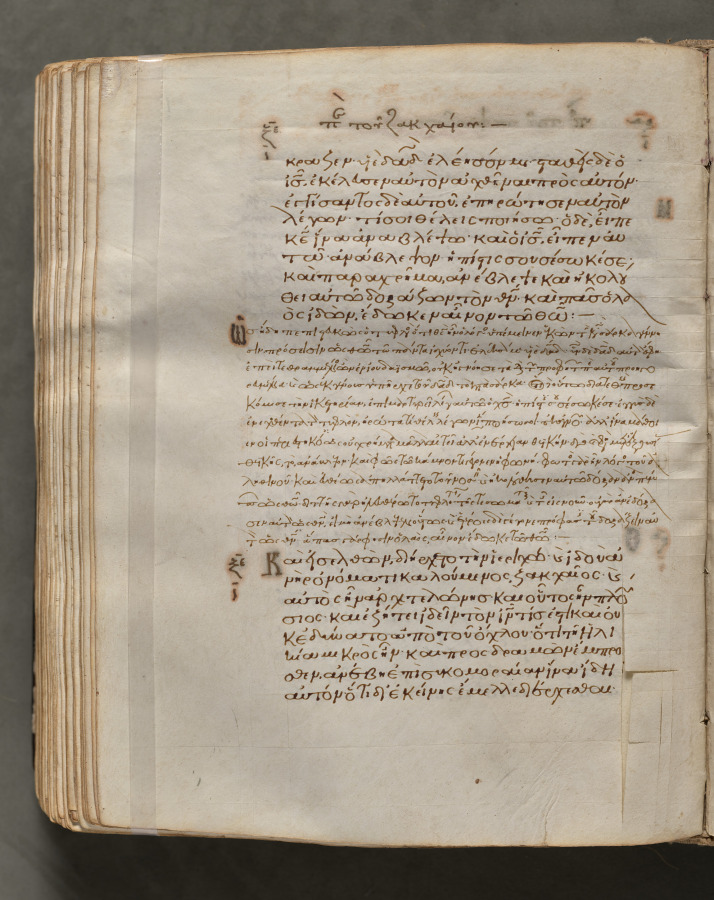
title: Text, folio 293 (verso), from a Gospel Book with Commentaries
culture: Byzantium, Constantinople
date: c. 1000–1100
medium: ink, tempera, and gold on vellum; leather binding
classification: Bound Volume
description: Each of the four gospels in this book opens on a page with brilliantly illuminated borders depicting the author of the text as well as birds—principally peacocks, symbols of the immortality of the soul—and fountains, representing the fountain of life and the salvation of the soul. This volume consists of 428 leaves with texts in Greek. Its level of sophistication suggests that it was probably written and decorated in a monastery in Constantinople.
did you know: Gospel books were carried in procession through Byzantine churches.